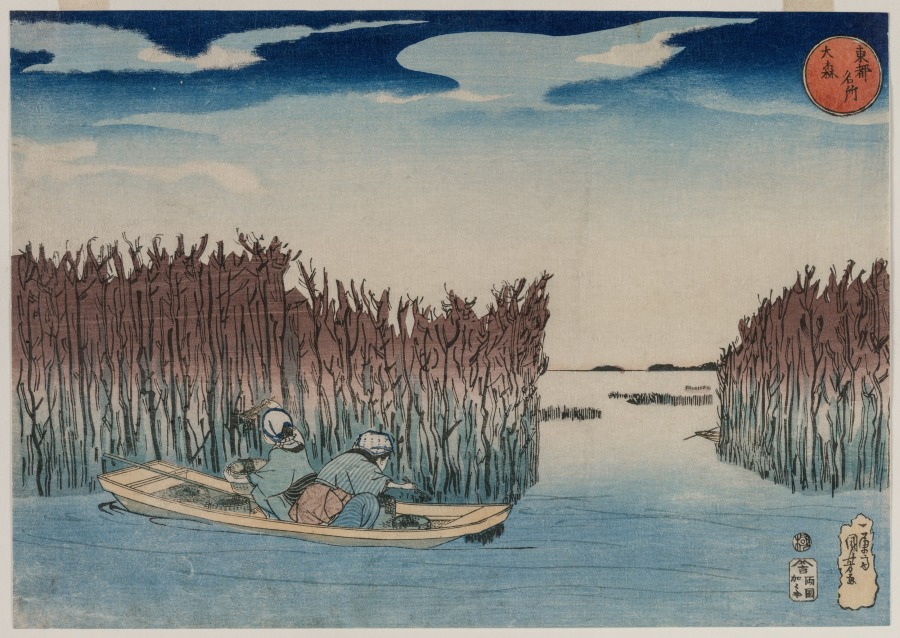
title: Ōmori, from the series Famous Places in the Eastern Capital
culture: Japan, Edo period (1615–1868)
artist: Utagawa Kuniyoshi (Japanese, 1797–1861)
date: early 1830s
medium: Color woodblock print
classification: Print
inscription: Signature: Ichiyusai Kuniyoshi ga. Publisher: Kagaya Kichibei (Kagaya, Ryogoku, emblem). Censorship Seal: kiwame.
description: Sites around Edo (present-day Tokyo) were popular subjects of ukiyo-e (pictures of the floating world) prints in the early 1800s. The calligraphy in the red circle on the upper right is the title of the series, The Famous Places in the Eastern Capital. The Ōmori district, on Edo Bay a few miles south of Edo, was known for its cultivation of nori, the crackly sheets of seaweed commonly wrapped around rice balls or sushi rolls. Utagawa Kuniyoshi depicted two women gathering seaweed from cultivation beds. One uses chopsticks, while the other gently rakes the seaweed into the baskets in their boat. The tip of another skiff behind the stand of plants on the right and the cultivation beds in the distance suggest the scale and importance of this industry.